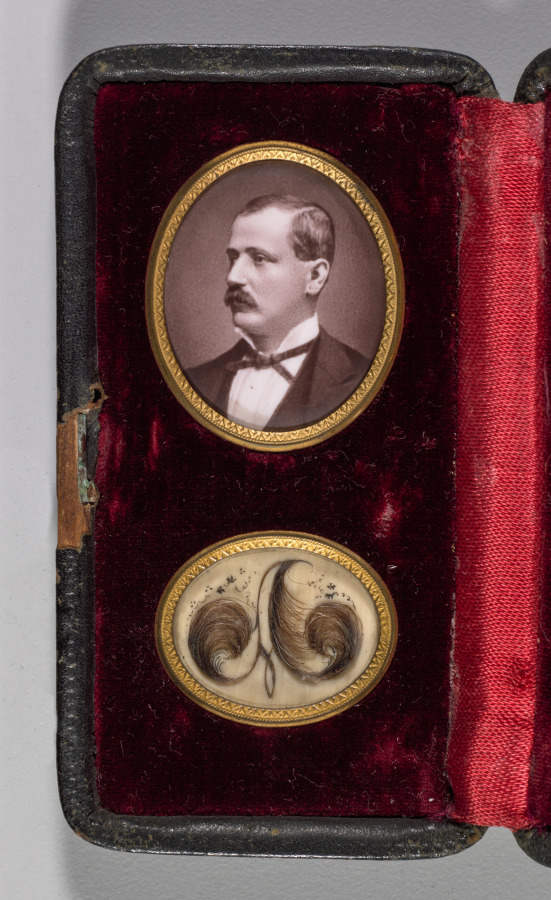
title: Untitled (Case with portraits of a man and woman and hair ornaments)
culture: 19th century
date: c. 1870s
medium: Photographs: photographs on enamel, framed in copper alloy metal frames; hair lockets: hair with pen and black and ink on cream-colored backing; case: leather with metal push-clasp and velvet-lined interior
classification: Photograph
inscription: No visible inscriptions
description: The photographs of this man and woman, presumably husband and wife, are juxtaposed with clippings of their hair arranged to form their initials, A and M. In the late 1800s, photographic portraits and hair clippings combined in jewelry or frames served as mementos or memorials for loved ones. For permanence, the portraits here were vitrified on enamel, a process now used primarily for funerary monuments.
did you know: "Hairwork," produced in commercial workshops and as a popular craft during the Victorian era, was used to celebrate the living and commemorate the dead.